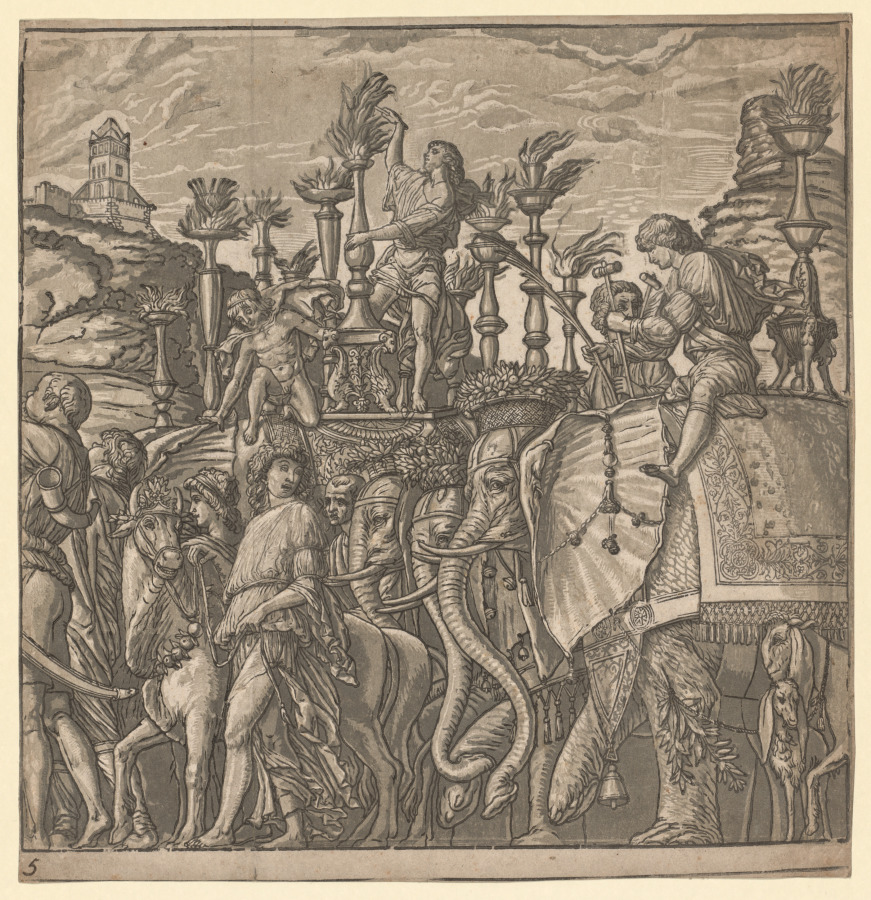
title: The Triumph of Julius Caesar: Elephants Carrying Torches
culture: Italy, 16th century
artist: Andrea Andreani (Italian, about 1558–1610)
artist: after Andrea Mantegna (Italian, about 1431–1506)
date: 1593–99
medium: chiaroscuro woodcut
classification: Print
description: Commissioned by Duke Vincenzo Gonzaga, this series of chiaroscuro woodcuts reproduces Andrea Mantegna’s Triumph of Julius Caesar, painted a century earlier. The scenes imaginatively portray the triumphal procession of the renowned Roman general and consul Julius Caesar following his successful defeat of Gaul in 52 BC. Each section of the continuous frieze shows elements typical of these parades, sanctioned by the Roman Senate and described in ancient texts. The printed suite’s frontispiece features a portrait bust of Mantegna, and the text below boasts that the famous paintings attracted many viewers. People who owned sets of these woodcuts often tacked them up to create a decorative frieze. Andreani issued the prints with a sheet of classical columns that could be cut out and placed between the scenes. Two fragments of these columns, colored orange, still flank the fourth scene.